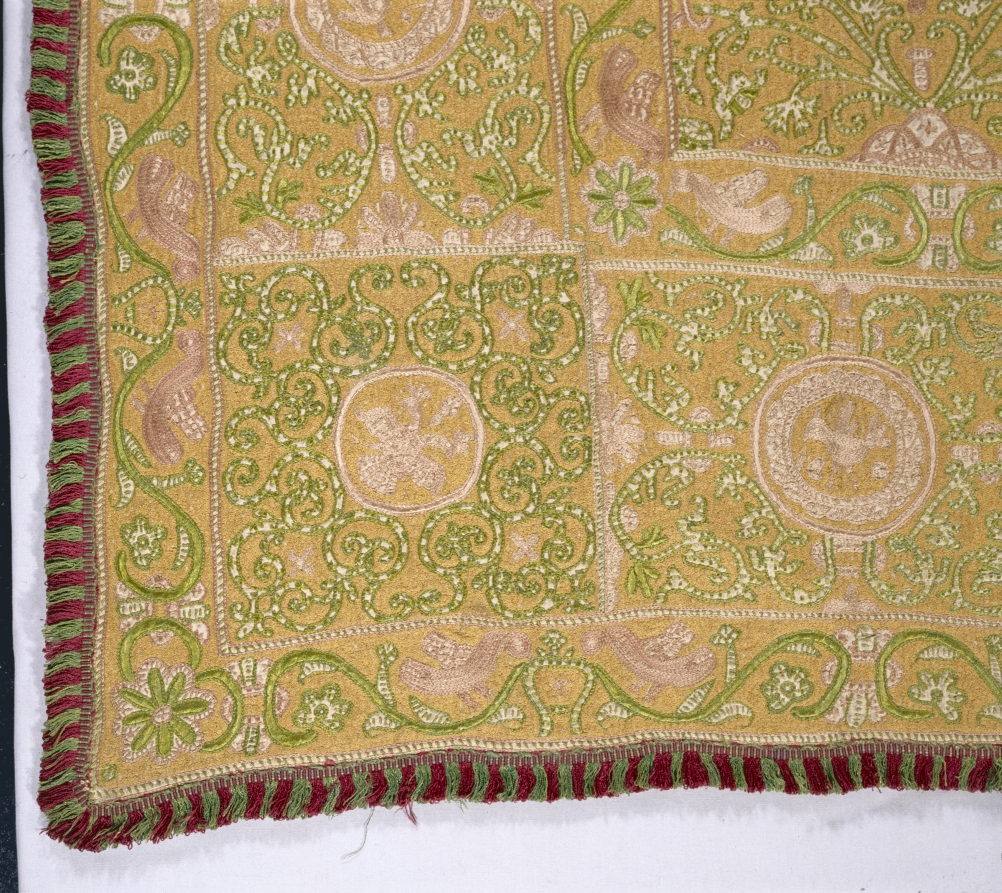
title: Embroidered Bedspread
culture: Portugal, 17th-18th century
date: 17th-18th century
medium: embroidery; silk on linen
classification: Embroidery